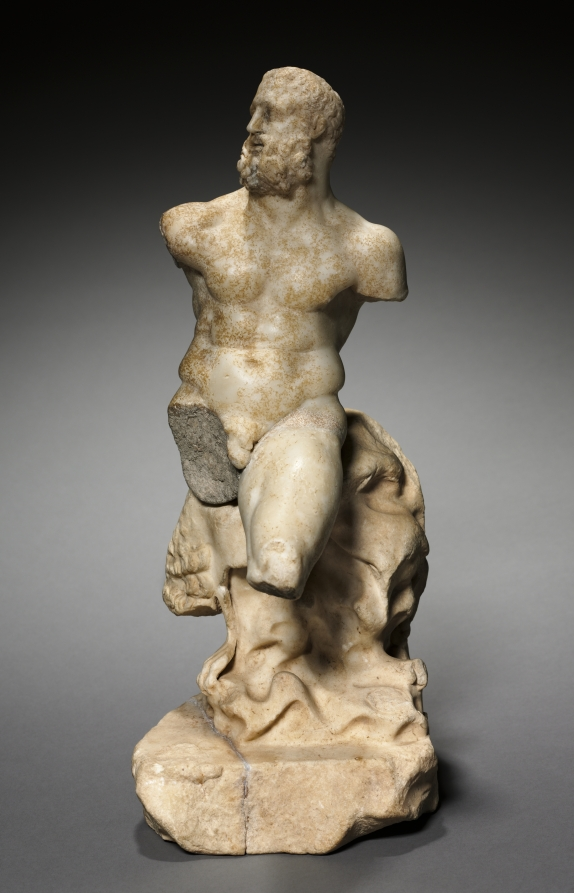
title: Herakles Epitrapezios (Hercules of the Table)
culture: Italy, Roman, Alexandrian(?)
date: 1–100 CE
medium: marble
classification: Sculpture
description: The Roman poets Martial and Statius mention a bronze statuette made by the master Greek sculptor Lysippos (active c. 360s-310s BC). It depicted the Greek hero Herakles seated on a rock with a drinking cup and was created for Alexander the Great, who claimed Herakles as an ancestor and carried the sculpture with him on his military campaigns. Later, the work was said to have been acquired by Hannibal, Sulla, and the famed Roman art collector Novius Vindex. The statuette is called epitrapezios (on the table) either because it was designed to be displayed on a tabletop or because it shows Herakles seated, as at a table. Later sculptors made many more versions, including this one, to meet the demand of Roman collectors enamored with Greek art.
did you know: The sculptor carved Herakles and his rocky seat (covered with his lionskin) from separate marble pieces.